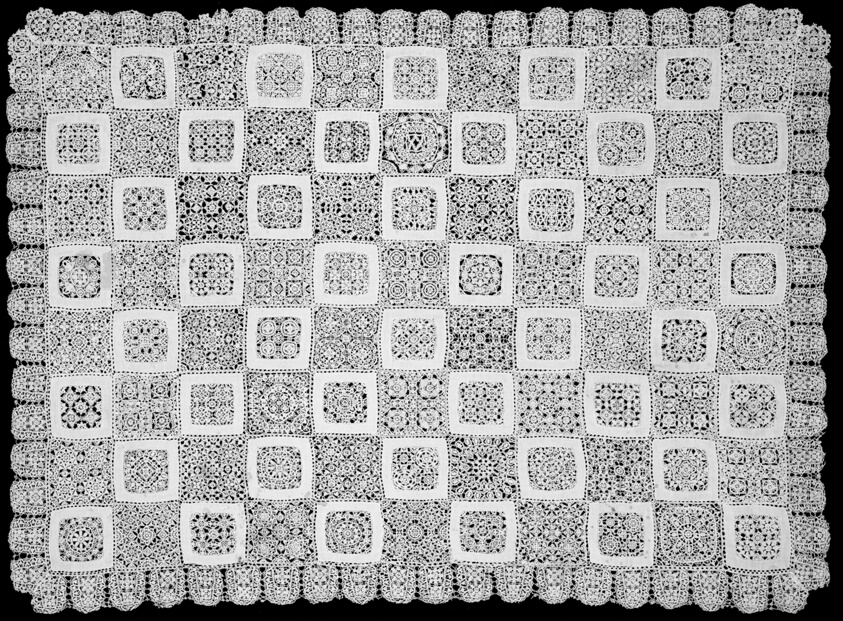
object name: Textile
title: Cover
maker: Belgium, Flanders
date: 1601/25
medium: Linen, squares of needle lace alternating with squares of plain weave cut work with needle lace inserts; edged with needle lace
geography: Flanders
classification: textile; lace - needle; lace